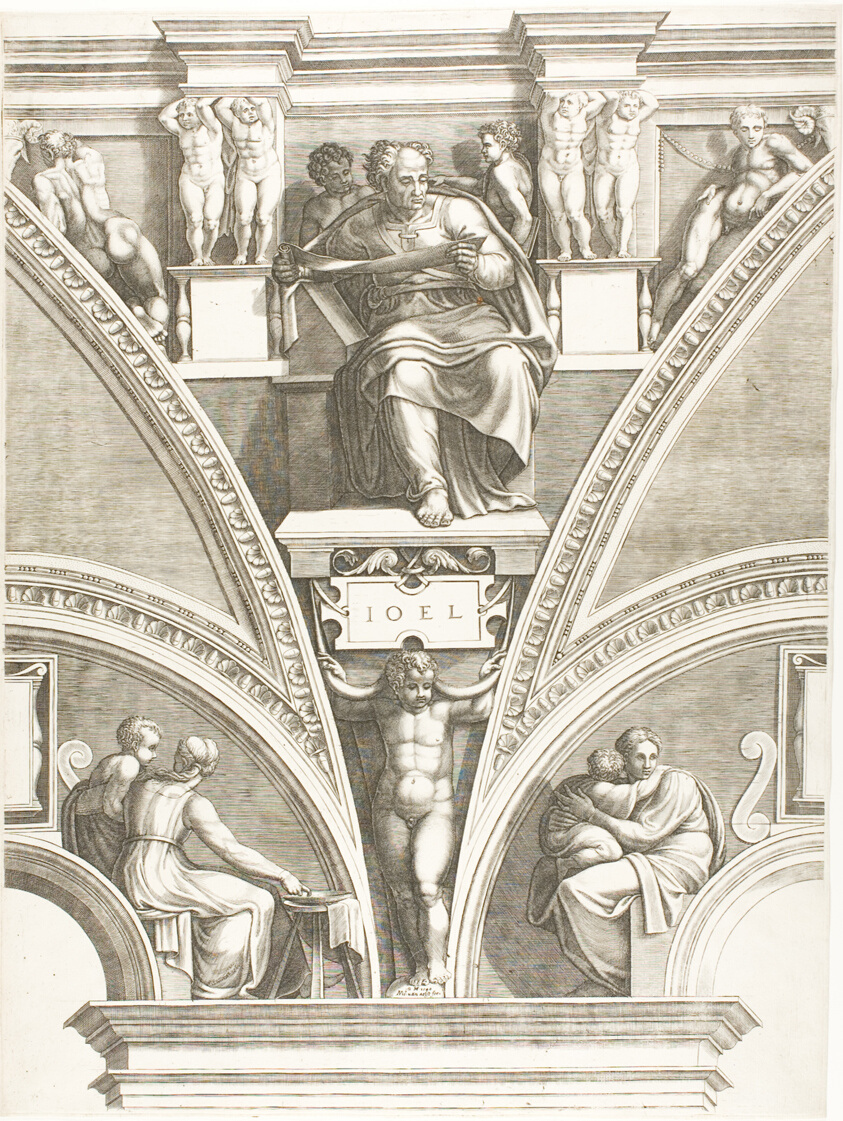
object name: Print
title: The Prophet Joel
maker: Giorgio Ghisi (Italian, 1520-1582); after Michelangelo Buonarroti (Italian, 1475-1564)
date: c. 1570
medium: Engraving on ivory laid paper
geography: Italy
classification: engraving; print; prints and drawing